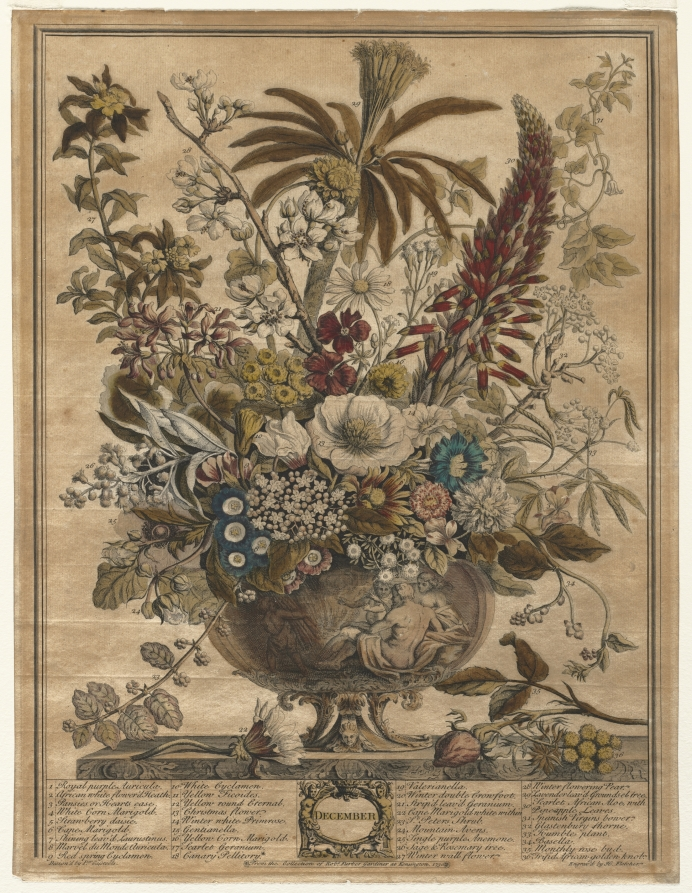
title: Twelve Months of Flowers: December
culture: England, 18th century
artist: Henry Fletcher (British, active 1715–38)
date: 1730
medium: engraving, hand-colored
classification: Print